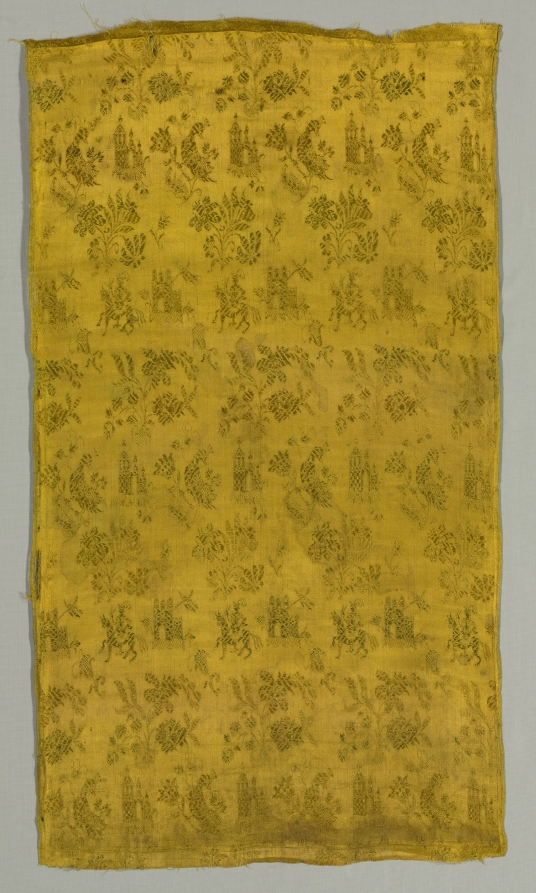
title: Silk Fragment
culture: Spain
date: 1700s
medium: fancy satin: silk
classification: Textile